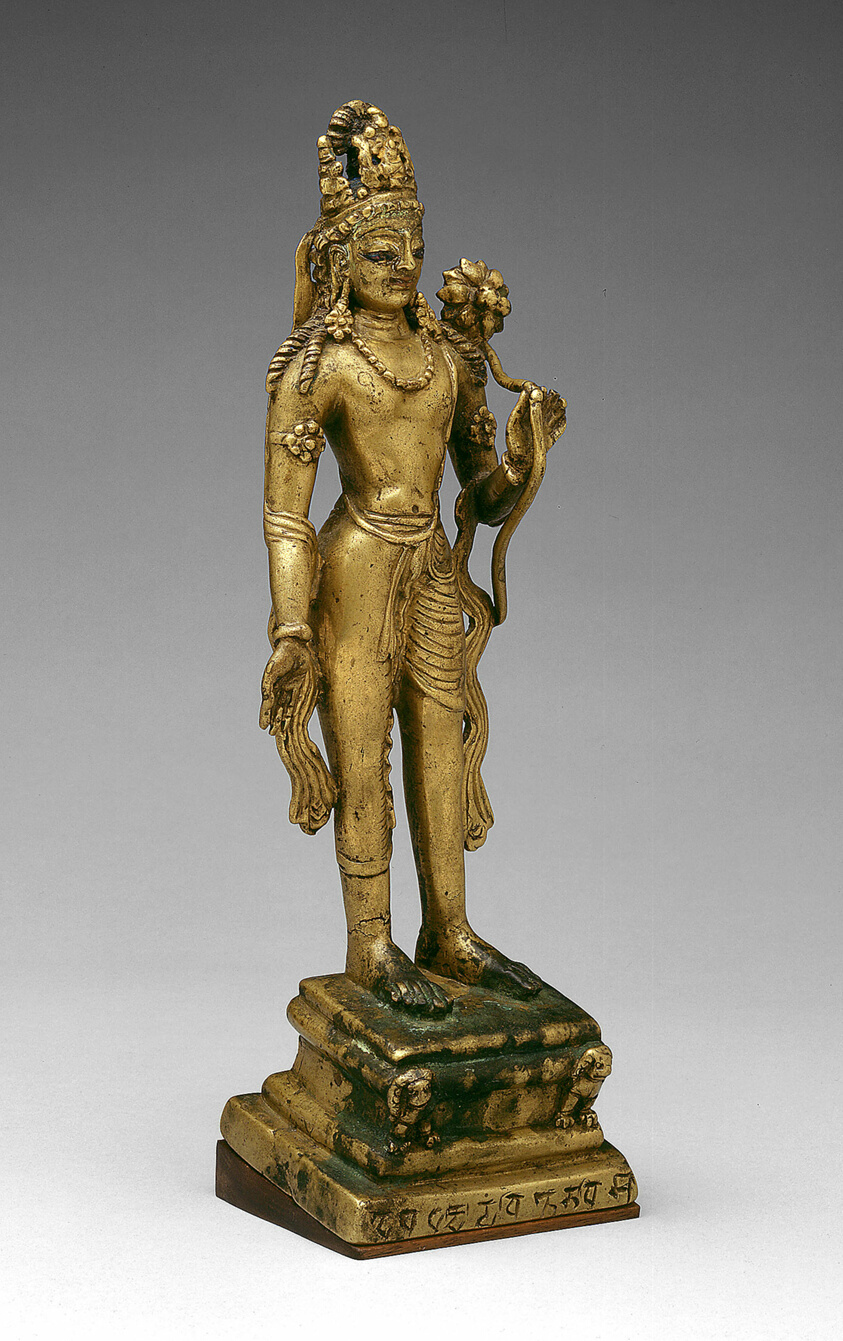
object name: Sculpture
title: Standing Bodhisattva Avalokiteshvara Holding a Lotus Flower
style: South Asian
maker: Pakistan; Khyber Pakhtunkhwa Province, Swat Valley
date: early 9th century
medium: Brass inlaid with copper and silver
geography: Swat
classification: brass; metal; sculpture; asian art